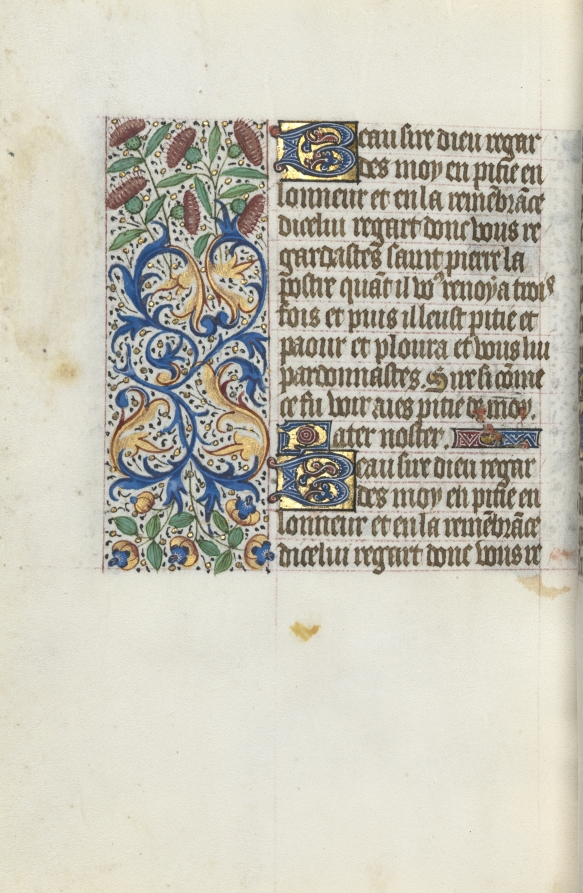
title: Book of Hours (Use of Rouen): fol. 153v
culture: France, Rouen, 15th century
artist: Master of the Geneva Latini (French, active Rouen, 1460–80)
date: c. 1470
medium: ink, tempera, and gold on vellum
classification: Bound Volume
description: In the late 1400s and early 1500s Rouen was an established and important center of book production. The city’s cathedral had a wealthy chapter that spent large sums of money to commission books and to maintain its extensive library. The stationers and booksellers would have likely been concentrated in or near the cathedral precinct. This artist, named after a manuscript now in Geneva, was Rouen’s principal illuminator during the second half of the 1400s.